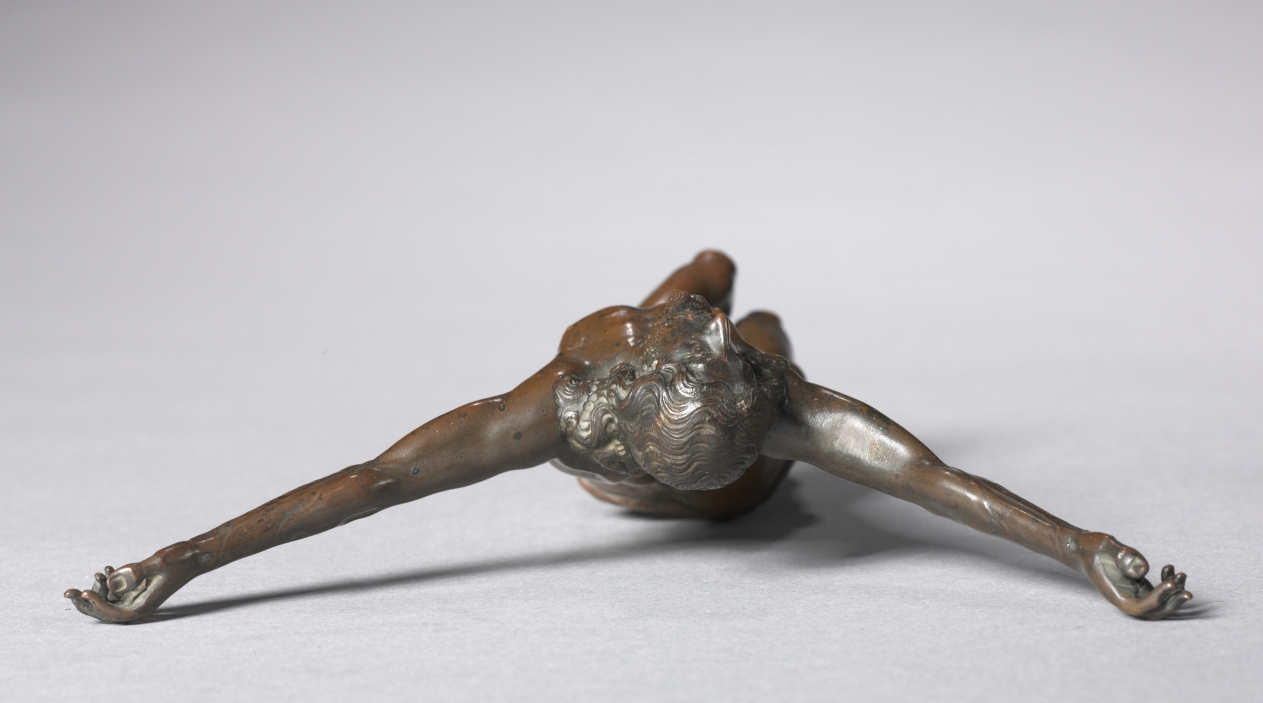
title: Christ Crucified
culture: Italy, Florence(?), 17th century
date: c. 1600–1650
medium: bronze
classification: Sculpture